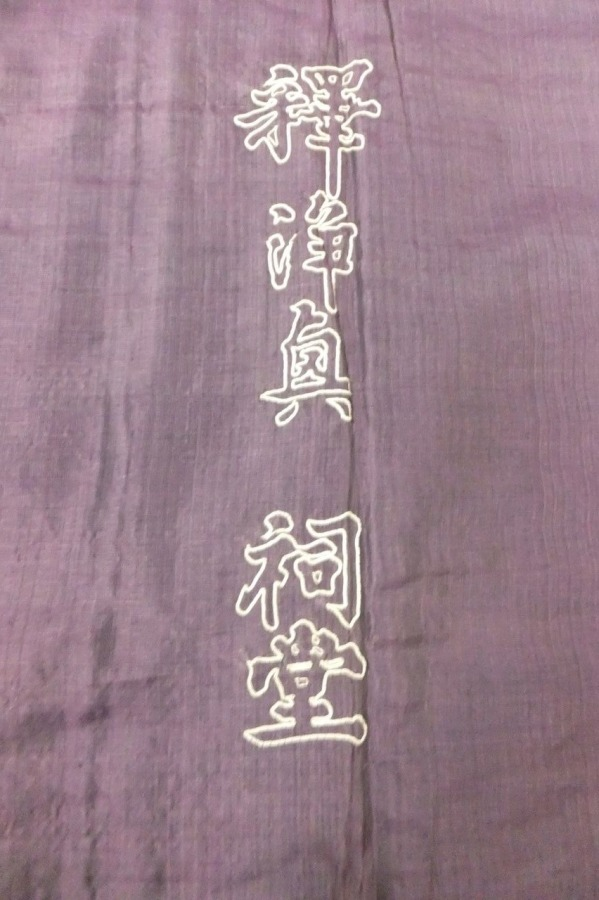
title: Buddhist Vestment (Kesa)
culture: Japan, Meiji period (1868–1912)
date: early 1900s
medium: silk; metal thread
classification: Garment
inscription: The back of this kesa has the inscription Shaku Joshin shido). The name indicates that the garment is associated with a True Pure Land Buddhist temple. A shido is a hall within the precincts of a Buddhist temple for the veneration of mortuary tablets of lay members of the temple community.